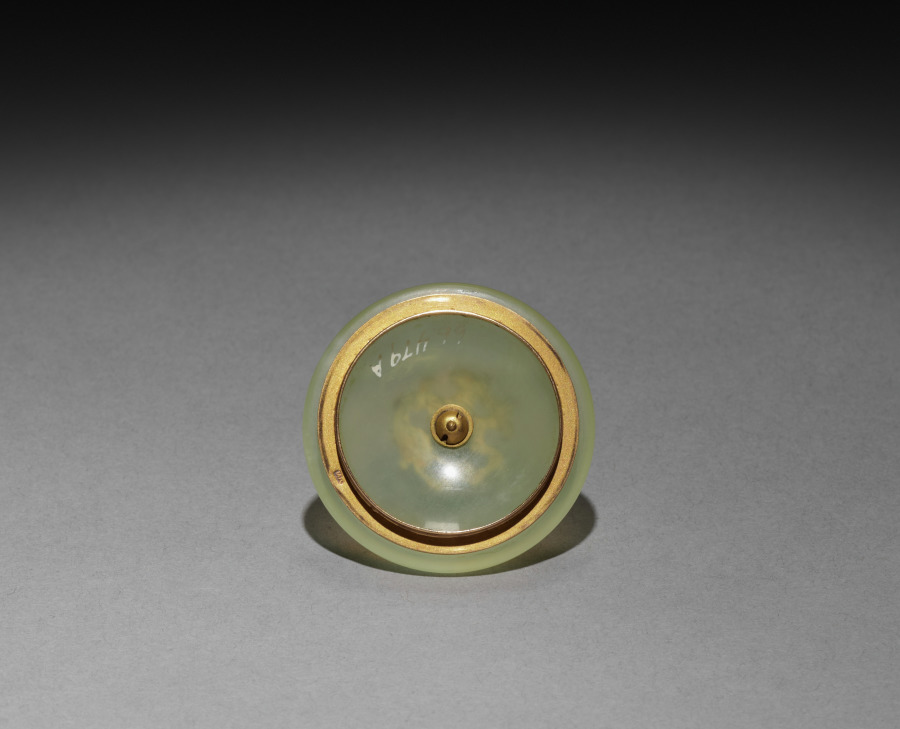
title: Cover for a Miniature Teapot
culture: Russia, St. Petersburg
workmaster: Mikhail Evlampievich Perkhin (Russian, 1860–1903)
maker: House of Fabergé (Russian, 1842–1918)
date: 1886–96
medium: gold, bowenite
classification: Miniature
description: The House of Fabergé specialized in the creation of little treasures intended as opulent personal gifts. In creating luxurious accessories for a desk or tabletop, Fabergé often used native hardstones such as multicolored agate and quartz, green nephrite, pink rhodonite, rock crystal, and pale green bowenite found in the Ural Mountains of western Russia. Fabergé's designers often paired hardstones with gold mounts, particularly in the St. Petersburg workshop where the goldsmiths were concentrated.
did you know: Sometimes called "new jade," bowenite is actually considered a semi-precious gemstone. Though Fabergé obtained his supply from the Ural Mountains of Russia, bowenite is also the state mineral of Rhode Island.